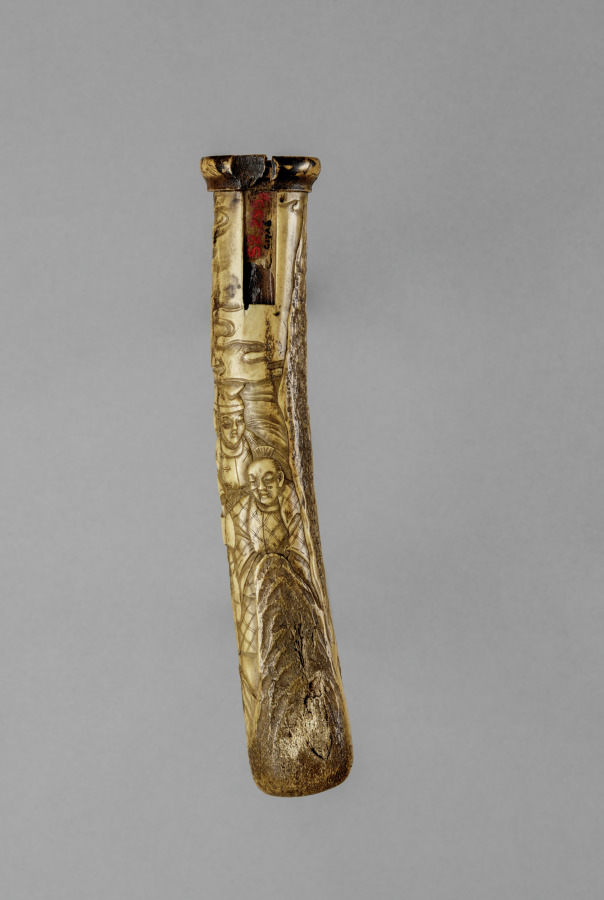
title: Case for a Knife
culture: Japan, Edo period (1615–1868)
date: late 1700s- early 1800s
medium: ivory, steel or iron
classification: Arms and Armor